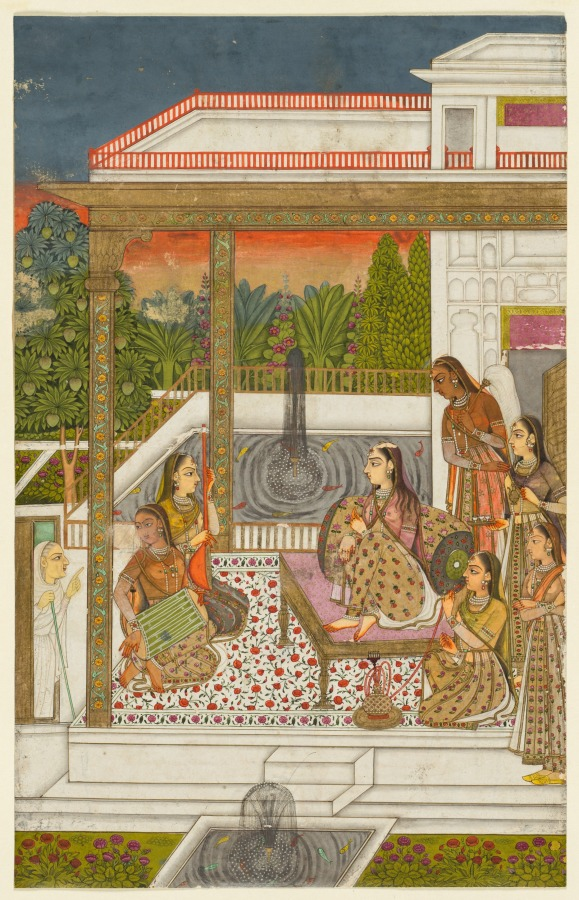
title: A princess with attendants on a terrace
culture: India, Hyderabad, Deccan, 18th century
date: c. 1720–1730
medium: Gum tempera and gold on paper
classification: Painting